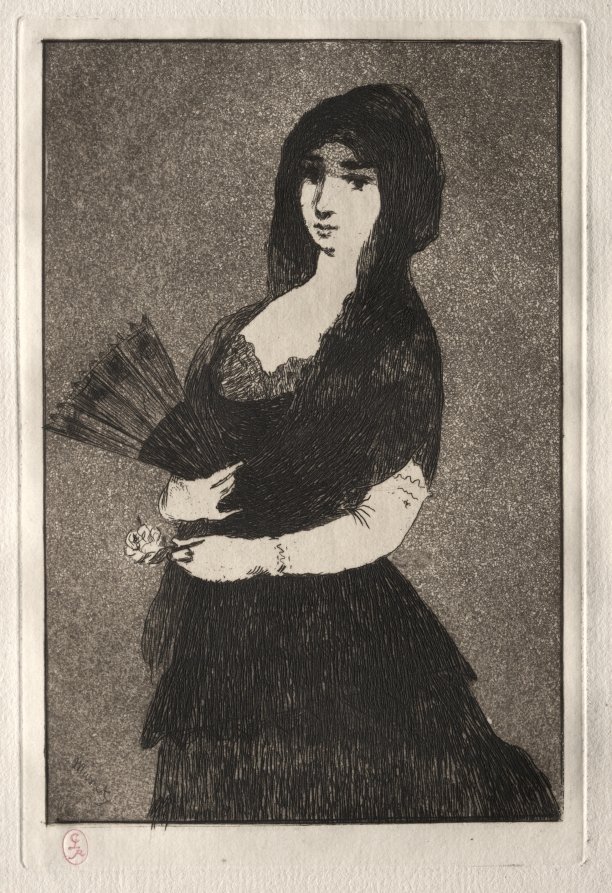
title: Exotic Flower (Fleur exotique)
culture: France, 19th century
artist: Édouard Manet (French, 1832–1883)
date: 1868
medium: etching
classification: Print